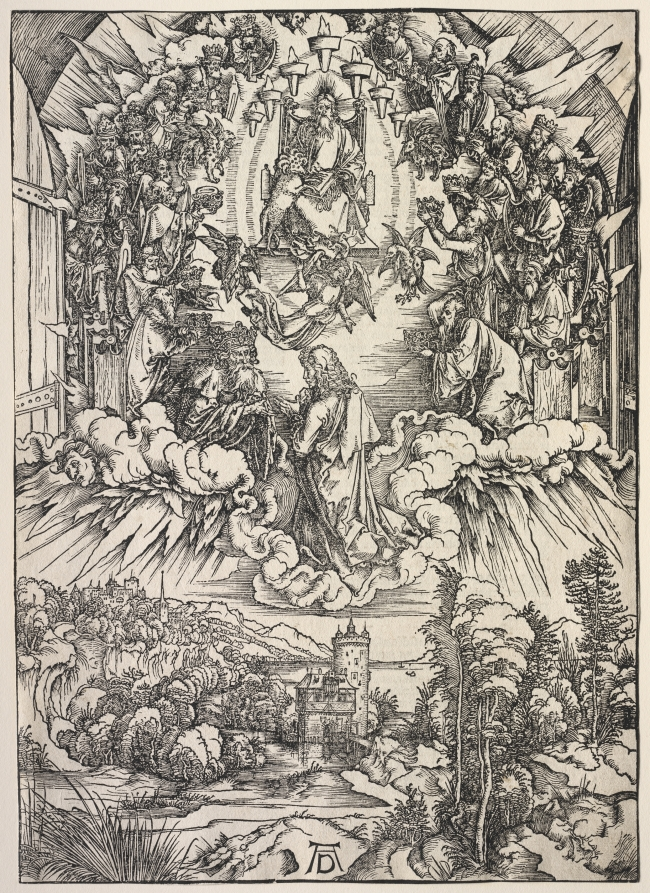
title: Revelation of St. John: St. John before the Throne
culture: Germany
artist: Albrecht Dürer (German, 1471–1528)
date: 1511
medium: woodcut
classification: Print